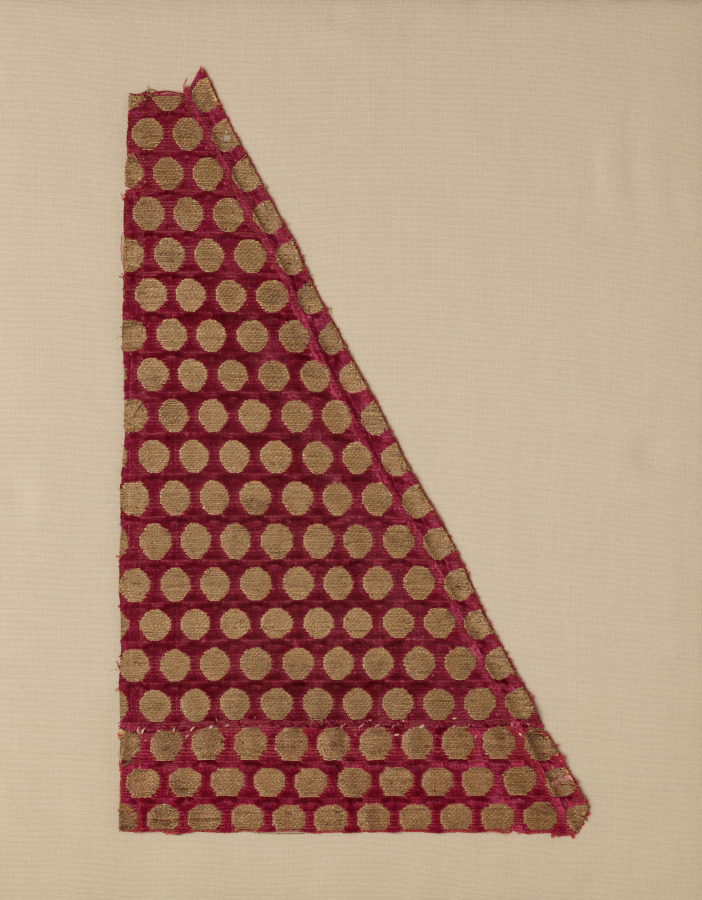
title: Velvet Fragment in Two Pieces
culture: Iran or Iraq, 14th century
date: 1300s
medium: velvet, lancé, silk and Cyprian gold around silk core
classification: Velvet